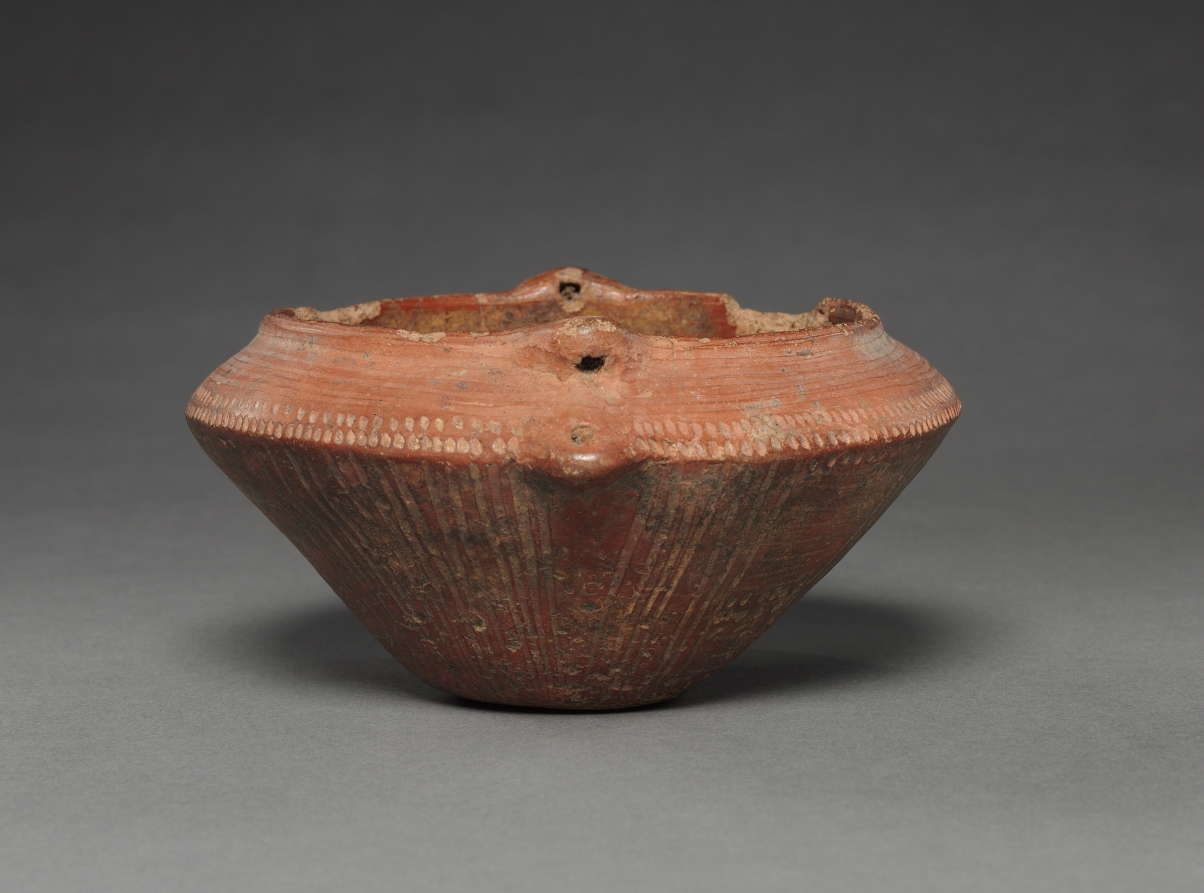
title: Dish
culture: Colombia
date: before 1550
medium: red ware with incised patterns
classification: Ceramic